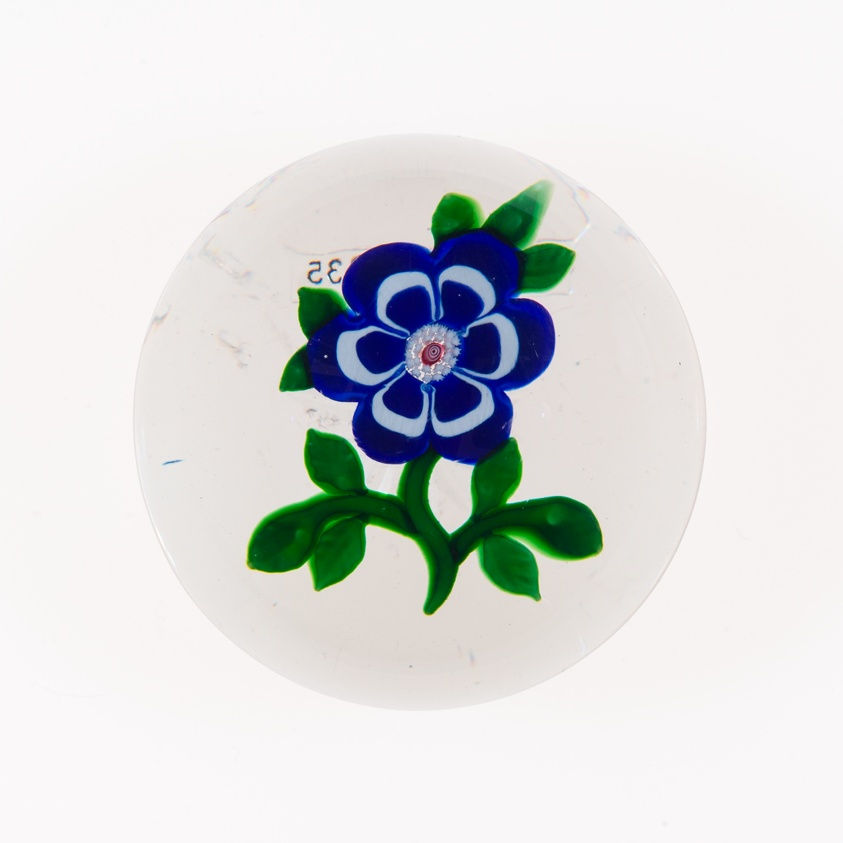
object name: Glass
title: Paperweight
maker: Baccarat Glassworks (Cristalleries de Baccarat); Lorraine, France, founded 1764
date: c. 1848–55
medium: Glass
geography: Baccarat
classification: paperweight; glass